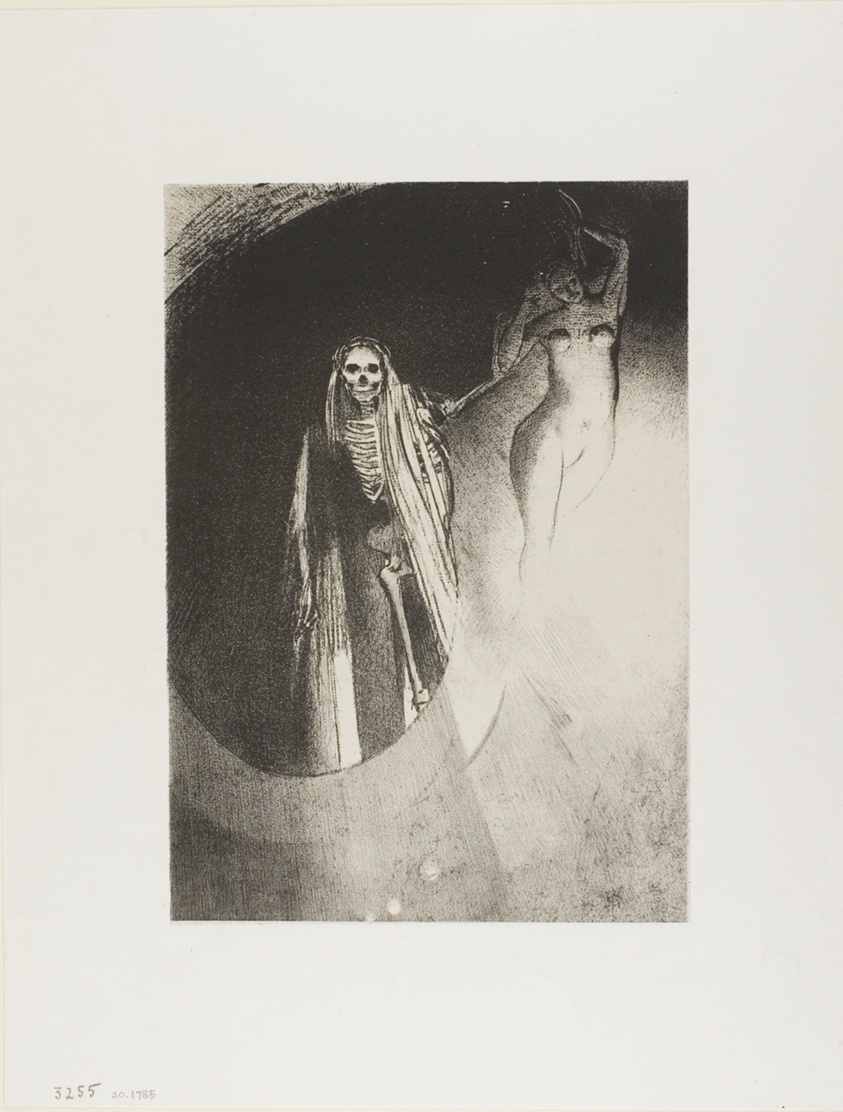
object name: Print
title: Death: It is I Who Make You Serious; Let Us Embrace Each Other, plate 20 of 24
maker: Odilon Redon (French, 1840-1916)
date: 1896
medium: Lithograph in black on cream China paper laid down on ivory wove paper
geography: France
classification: lithograph; print; prints and drawing; paper